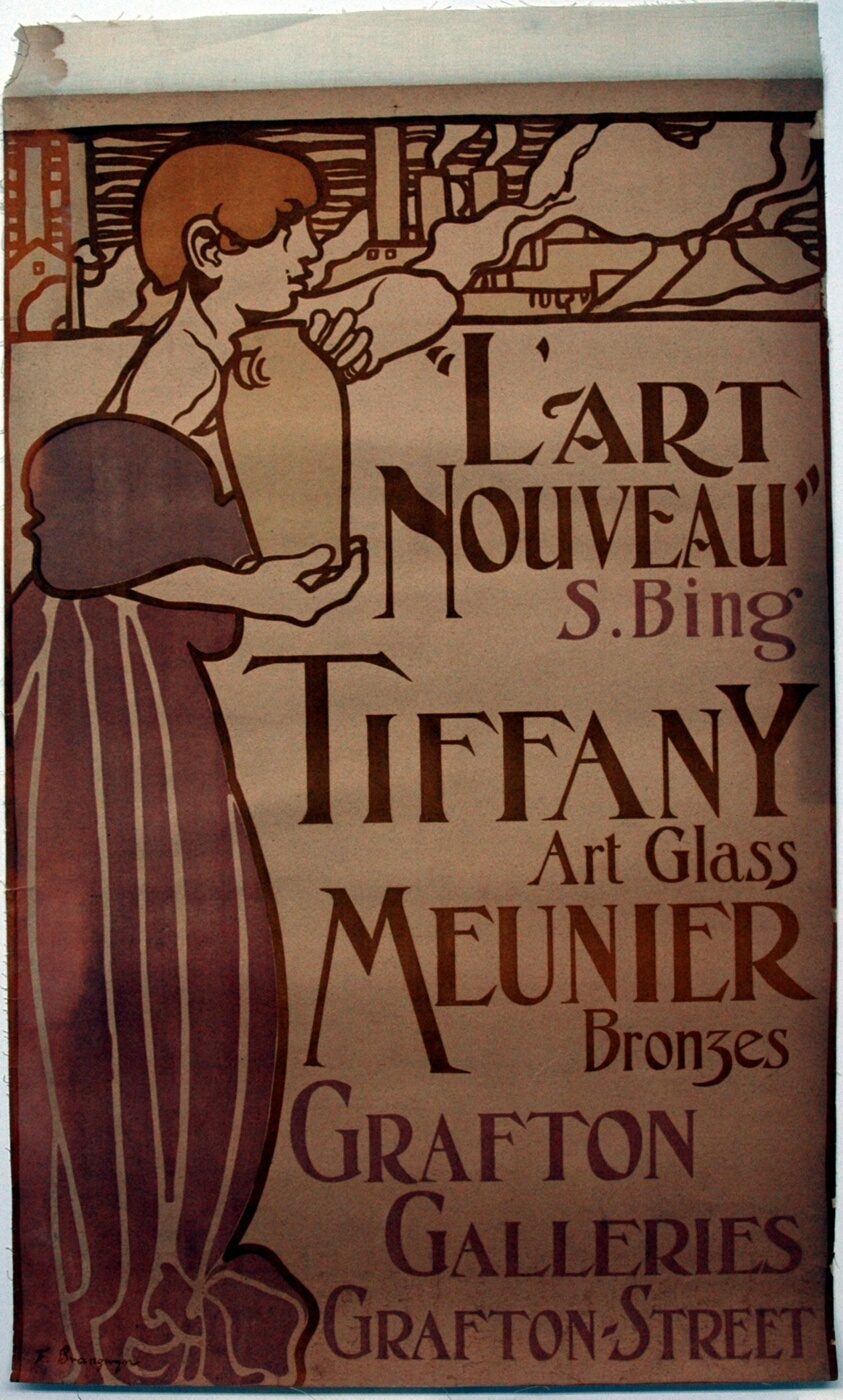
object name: Print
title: L'Art Nouveau, Grafton Galleries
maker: Frank Brangwyn (English, 1867-1956); printed by Charles Verneau (French, active 1890s)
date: 1899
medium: Color lthograph on cream wove paper, laid down on linen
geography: England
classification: lithograph; print; prints and drawing